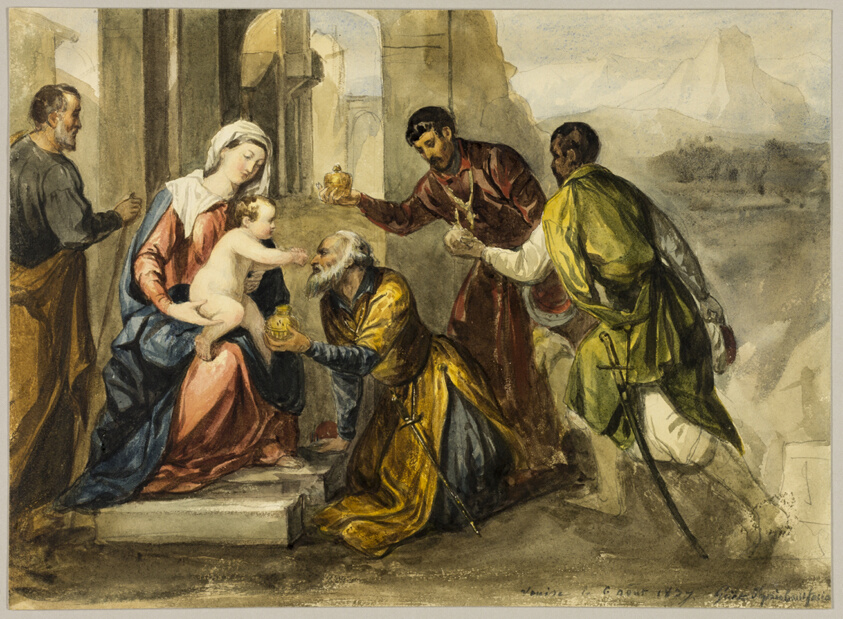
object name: Drawing and Watercolor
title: Adoration of the Magi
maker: After Bonifazio de' Pitati, called Bonifazio Veronese; Italian, c. 1487-1553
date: 1827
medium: Watercolor, over graphite, on ivory wove paper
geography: Italy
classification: watercolor; drawings (visual works); prints and drawing